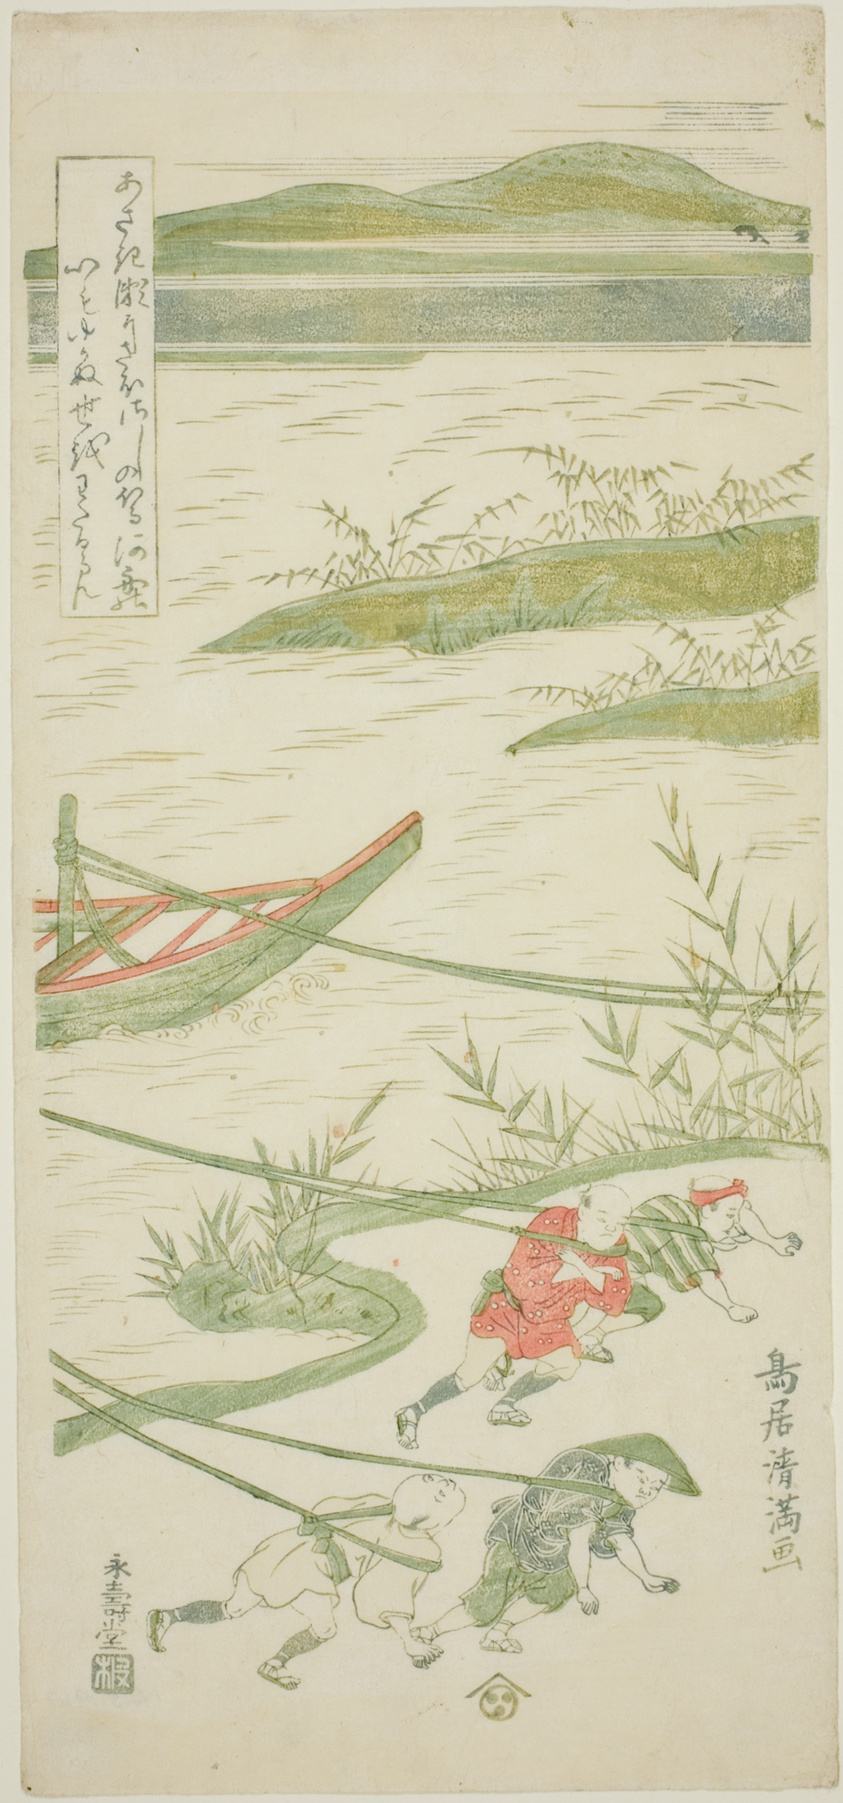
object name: Print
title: Towing boats against the current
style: Japanese (culture or style)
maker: Torii Kiyomitsu I (Japanese, 1735-1785)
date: c. 1764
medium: Color woodblock print; hosoban, mizu-e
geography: Japan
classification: woodblock print; print; asian art